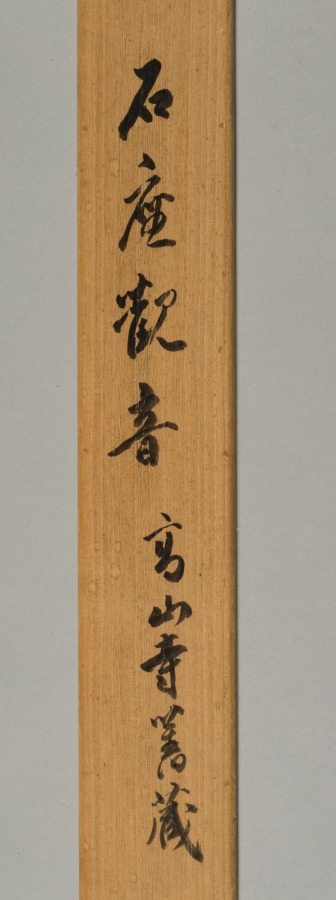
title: White-Robed Kannon (Byakue Kannon)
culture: Japan, Kamakura period (1185–1333)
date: c. 1200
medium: hanging scroll; ink on paper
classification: Painting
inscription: 箱書 石座観音 高山寺舊蔵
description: Kannon is a deity of mercy and compassion in the Buddhist faith. This monochrome sketch comes from Kōzan-ji, a temple in northwest Kyoto. The subdued ink tones and plain brushwork reflect the taste of Zen Buddhism, which began to have an impact on the visual arts in 13th-century Japan.